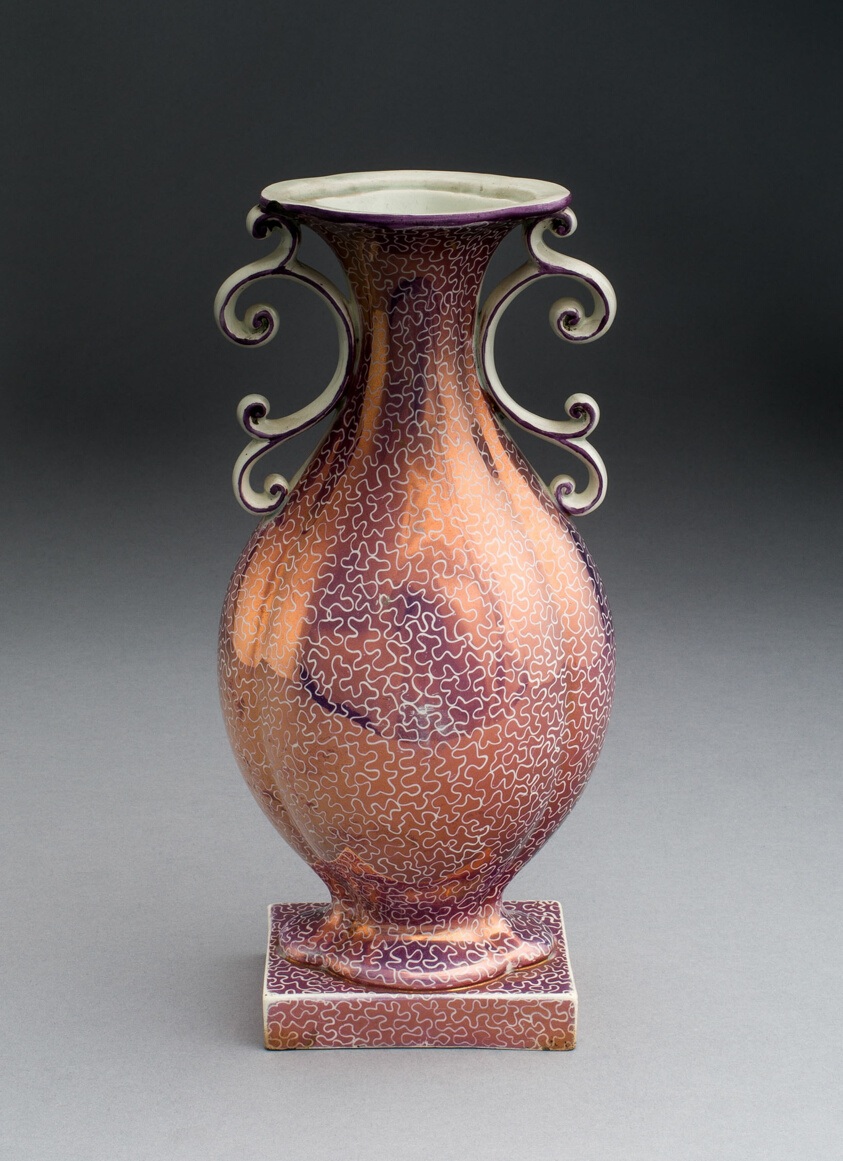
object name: Ceramics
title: Vase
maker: England, Staffordshire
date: c. 1810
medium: Lead-glazed earthenware with lustre decoration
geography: Staffordshire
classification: vase; earthenware; vessel; european decorative arts; ceramics